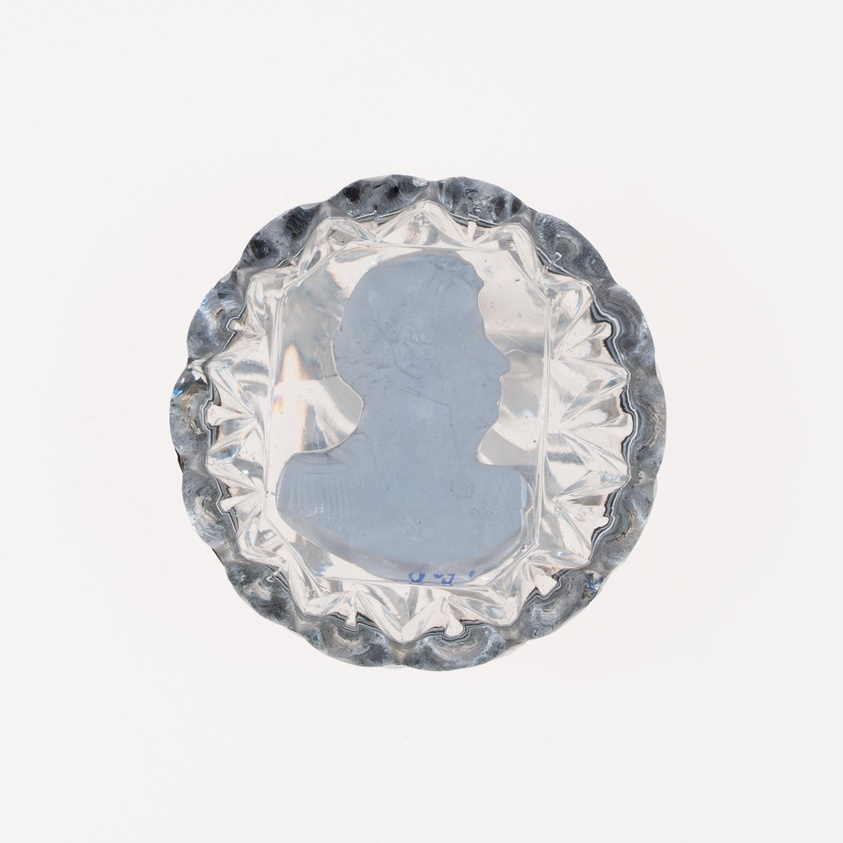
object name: Glass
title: Box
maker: Baccarat Glassworks (Cristalleries de Baccarat); Lorraine, France, founded 1764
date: c. 1846–55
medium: Glass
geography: Lunéville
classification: paperweight; glass; european decorative arts